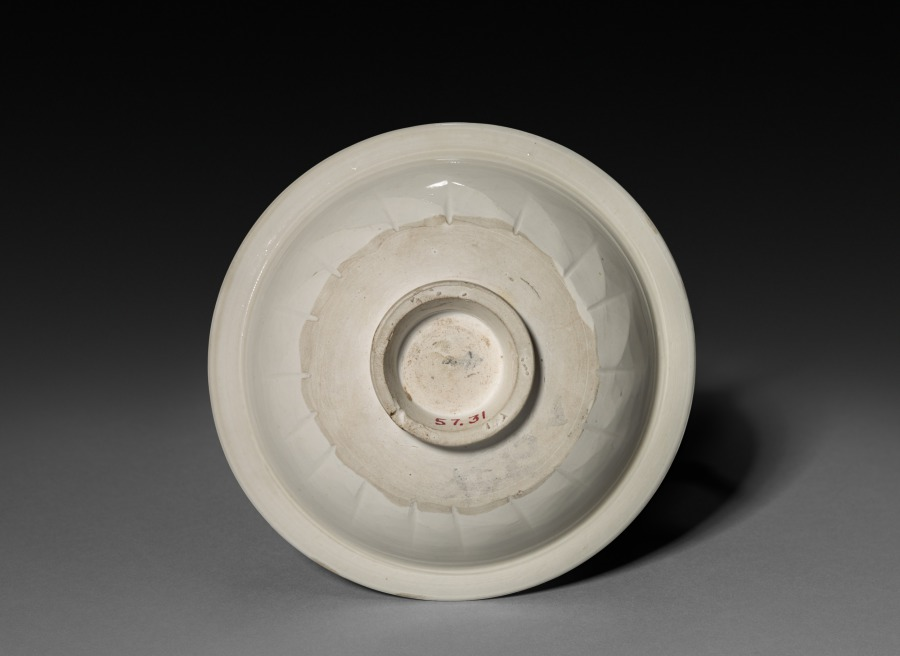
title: Circular Dish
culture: China, possibly Liao Kingdom, Northern Song dynasty (960-1127)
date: 12th Century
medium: white porcelain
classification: Ceramic